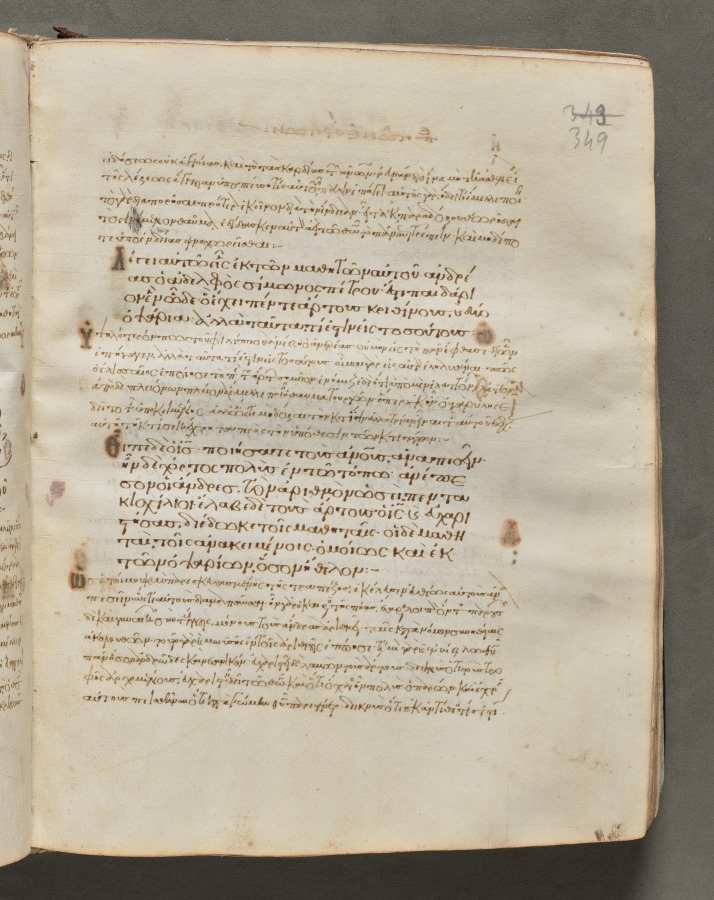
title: Text, folio 349 (recto), from a Gospel Book with Commentaries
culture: Byzantium, Constantinople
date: c. 1000–1100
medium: ink, tempera, and gold on vellum; leather binding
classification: Bound Volume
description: Each of the four gospels in this book opens on a page with brilliantly illuminated borders depicting the author of the text as well as birds—principally peacocks, symbols of the immortality of the soul—and fountains, representing the fountain of life and the salvation of the soul. This volume consists of 428 leaves with texts in Greek. Its level of sophistication suggests that it was probably written and decorated in a monastery in Constantinople.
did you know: Gospel books were carried in procession through Byzantine churches.